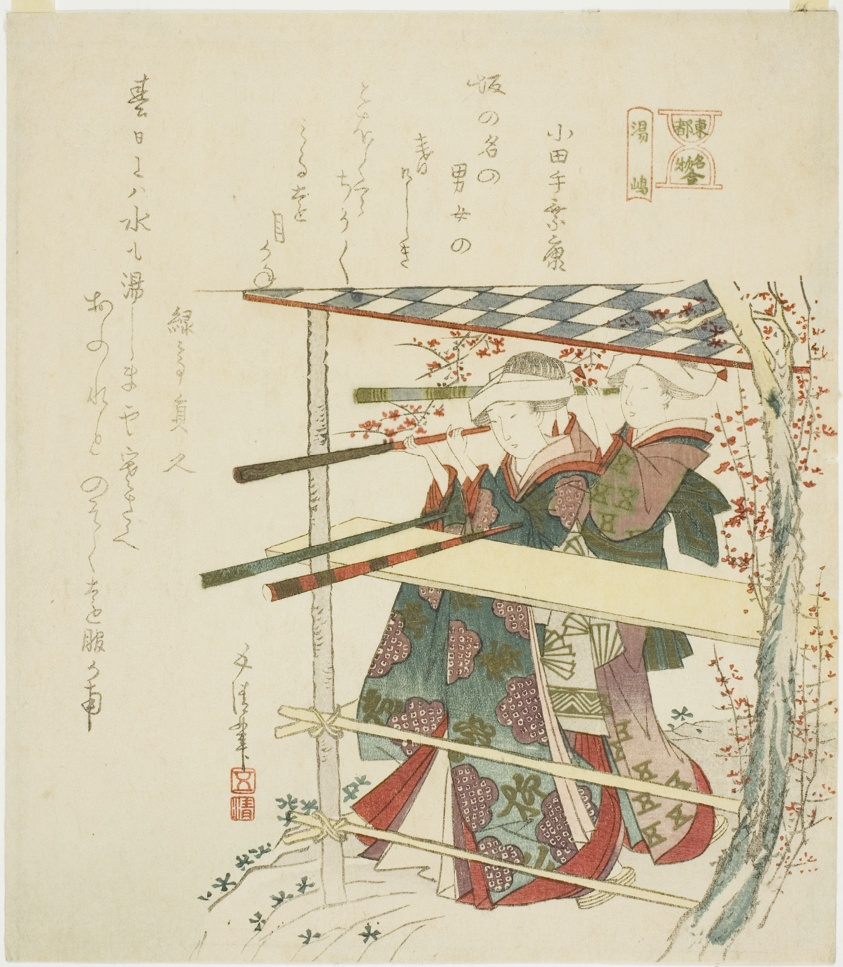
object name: Print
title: Yushima, from the series "A Comparison of Famous Things in the Eastern Capital (Toto meibutsu awase)"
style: Japanese (culture or style)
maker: Hotei Gosei (Japanese, active c. 1804-44)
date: c. 1811/12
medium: Color woodblock print; shikishiban, surimono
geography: Japan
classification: woodblock print; print; asian art